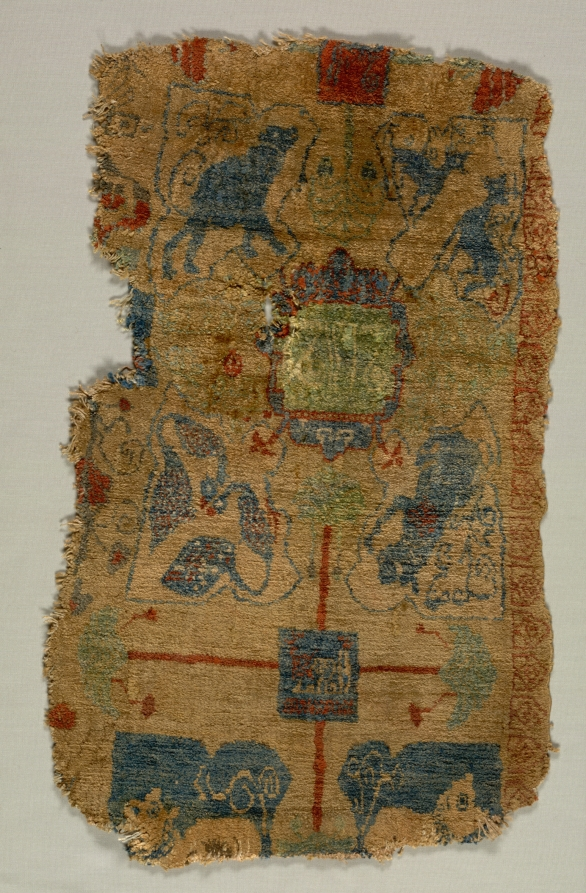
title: Carpet Fragment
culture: Iran, Rayy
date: late 1800s–early 1900s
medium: Silk: knotted pile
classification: Carpet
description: This rectangular fragment has large spade-shaped palmettes filling each corner. The palmettes bear dark blue and red animals and birds on a cream/ivory background. The central dark blue medallion encloses an irregular, inscription-bearing green square. At the top and bottom center is a smaller inscription-bearing square with date palms extending from cardinal points; vertical palms divide the rectangle, and horizontal palms delineate the start of a new repeat wherein palmettes have dark blue background with cream/ivory animal figures.